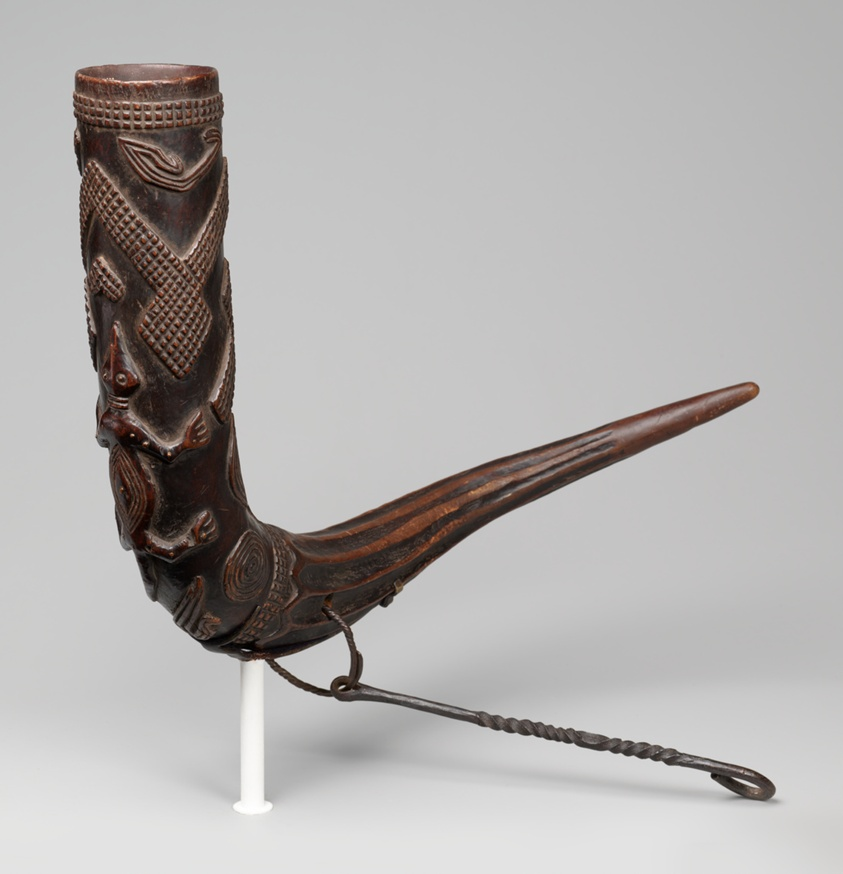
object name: Vessel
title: Horn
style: kuba (democratic republic of congo style, Arts of Africa, Central Africa, african Art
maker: Kuba; Kasai region, Democratic Republic of the Congo; Central Africa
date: Late 19th-early 20th century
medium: Wood, copper alloy, and iron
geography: Democratic Republic of the Congo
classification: drinking vessel; arts of Africa; vessel; african art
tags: drinking, animals, Buffalo, abstract figures, geometric, status